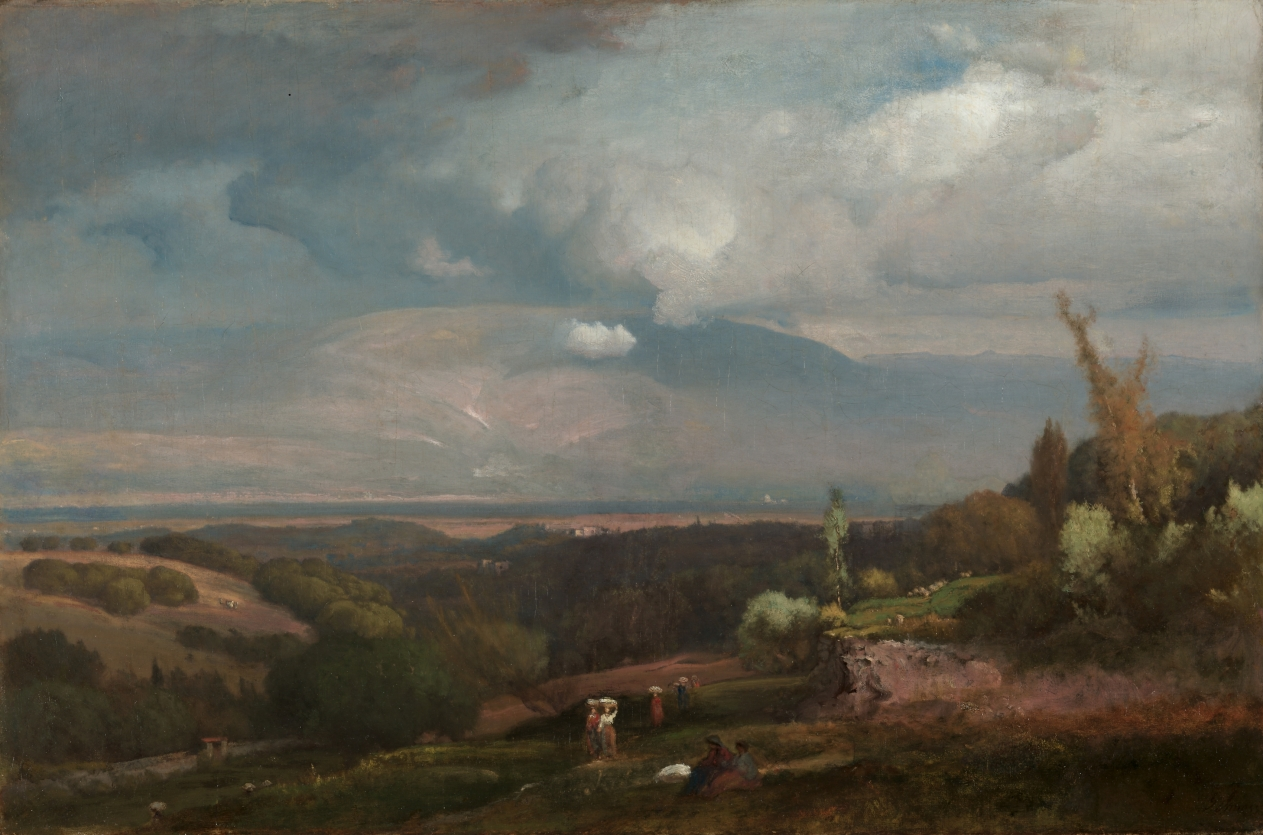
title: Approaching Storm from the Alban Hills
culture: America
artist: George Inness (American, 1825–1894)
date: 1871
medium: oil on canvas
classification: Painting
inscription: signed lower right: [G. Inness] Rome 1871 G. Inness [first signature effaced]